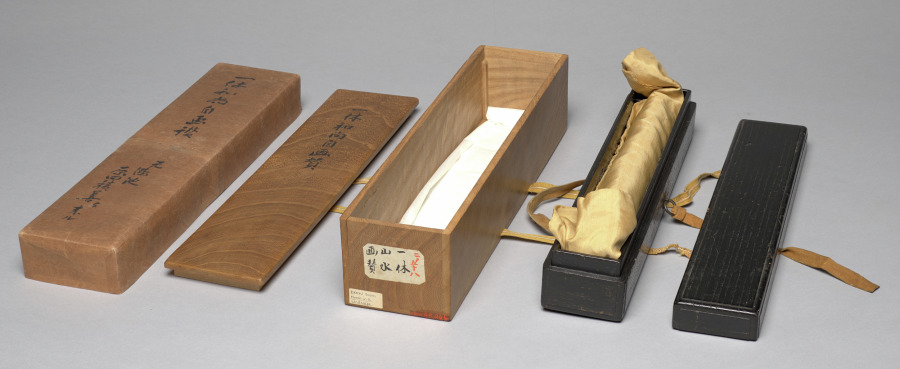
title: Listening to the Wind in the Pines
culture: Japan, Muromachi period (1392–1573)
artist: Ikkyū Sōjun (Japanese, 1394–1481)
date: 1400s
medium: hanging scroll; ink on paper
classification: Painting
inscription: 山居僧聴松風/何須臨済徳山禅一箇住山/三十年公案工夫了畢後/長松風静罷参眠 (transcribed by Trevor Menders with Zheng Xiaoying 2017, revised by Osvaldo Mercuri 2021)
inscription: 紫野龍寶門客东海純一休老和尚畫と詩一筆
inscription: 落款 一休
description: A monk sits in contemplation below an overhang covered with pine. The poem, titled "Monk in the Mountains Listening to the Wind in the Pines," refers to two Chinese Chan (Zen) Buddhist monks active in the ninth century. It may be translated as follows: Why must the Zen of Rinzai (Linji Yixuan) and Tokusan (Deshan Xuanjian) reside in a single temple for thirty years? Once he's solved his kōan, (the monk) ends his practice and falls asleep in the quietness of the wind among the tall pines. (translated by Osvaldo Mercuri) According to an inscription following the poem, both painting and verse were done by an eminent Japanese Buddhist monk known for revitalizing the Kyoto temple Daitokuji.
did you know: The word mountain, appearing in the title to the poem on this painting, can also refer to a temple.